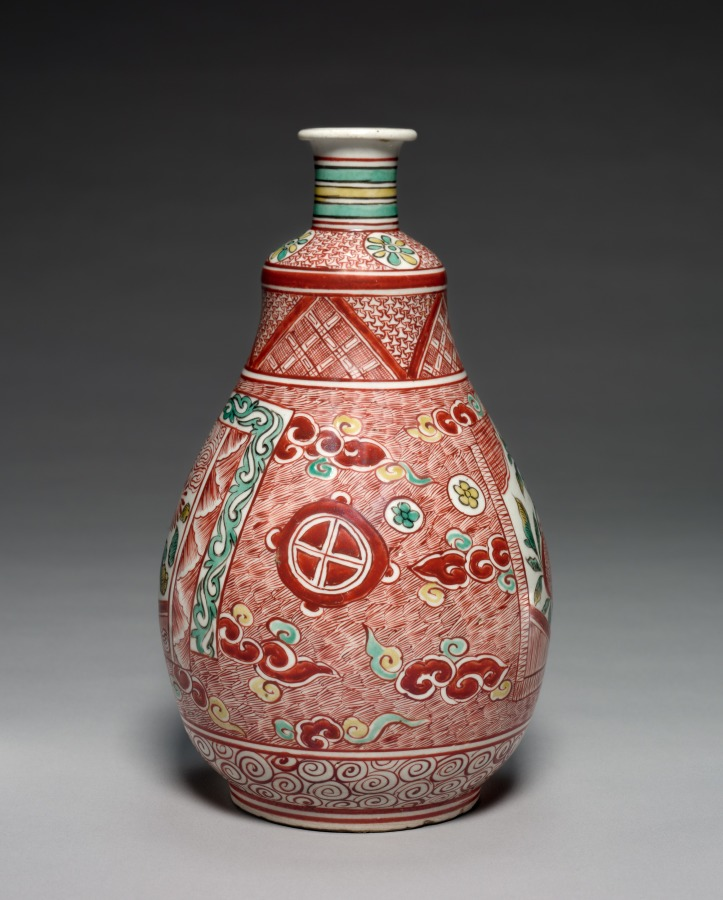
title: Tea Whisk-Shaped Sake Bottle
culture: Japan, Edo period (1615–1868)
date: 1660s–early 1670s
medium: Porcelain with overglaze enamel (Hizen ware, early iro-e)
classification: Ceramic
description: This sake bottle resembles a whisk used in preparing powdered green tea, with the handle at the top and the body of the brush flaring out below. Its bold design is anchored by images of chrysanthemums and pomegranates set in panels against a ground of red hatching with tricolored clouds. Additional patterns of swirls, stripes, flowers, and other forms make the piece dazzling.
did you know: This bottle is for sake, or fermented rice wine, Japan's most famous variety of local alcohol.